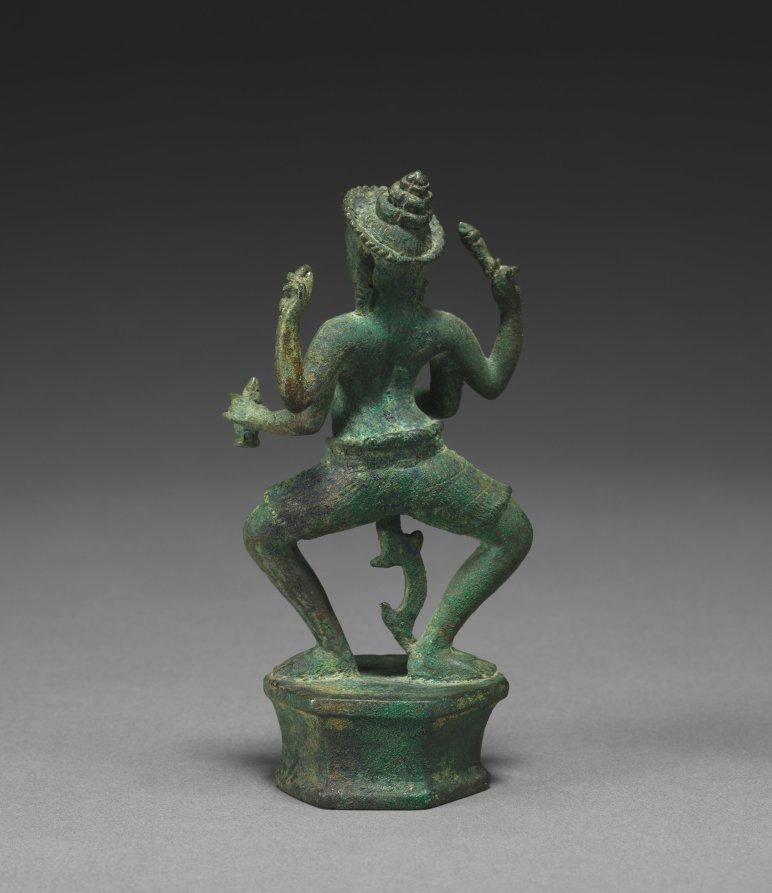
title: Four-Armed Standing Tantric Male Divinity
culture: Cambodia, Koh Ker/Khleang style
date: 925–75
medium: bronze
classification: Sculpture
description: In his four hands, the male tantric deity holds a noose, bell, vajra, and club.